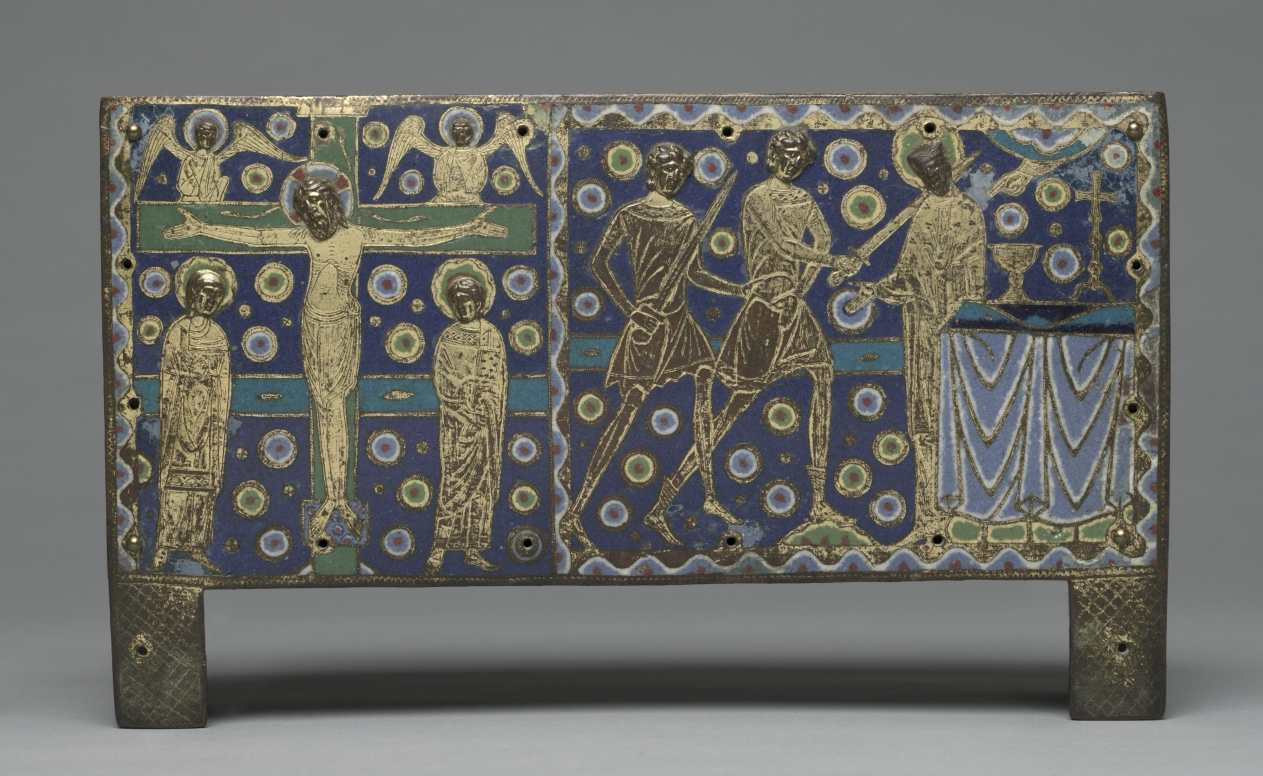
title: Plaque from a Chasse for Relics of Saint Thomas Becket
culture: France, Limousin, Limoges, Gothic period, 13th century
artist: Master G. Alpais (French)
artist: and Workshop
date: 1220–25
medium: copper: gilded and engraved; champlevé enamel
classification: Enamel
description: On December 29, 1170, Archbishop Thomas Becket was brutally murdered in Canterbury Cathedral. The immediate popularity of Becket’s cult is reflected in the large number of enamel reliquaries produced in late 12th- and early 13th-century Limoges workshops to house relics associated with the archbishop, who was canonized only three years after his death. This plaque, which pairs a scene depicting the Martyrdom of Thomas Becket with one of Christ’s Crucifixion, once formed the principal face of such a reliquary.